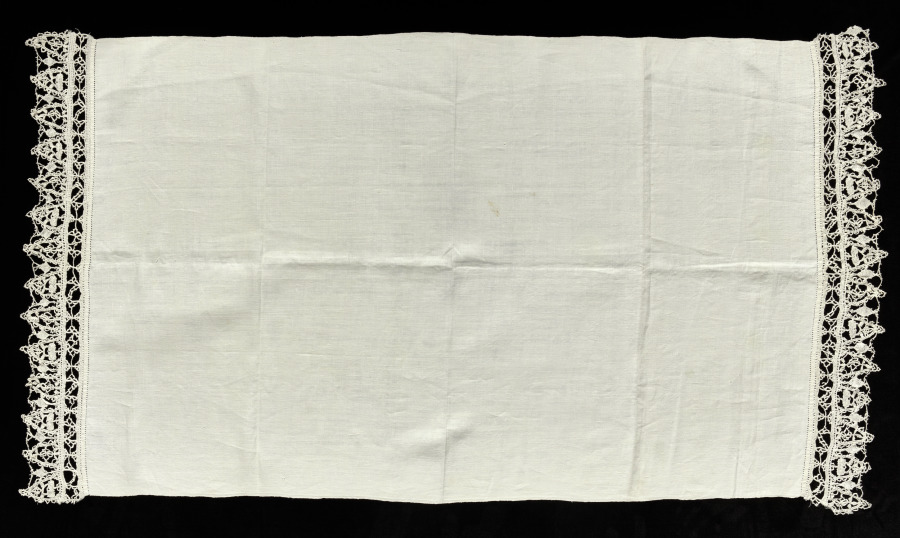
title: Cloth with Lace Edging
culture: Italy, Venice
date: 1600s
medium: Linen: needle lace, reticella with punto in aria lace edging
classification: Lace